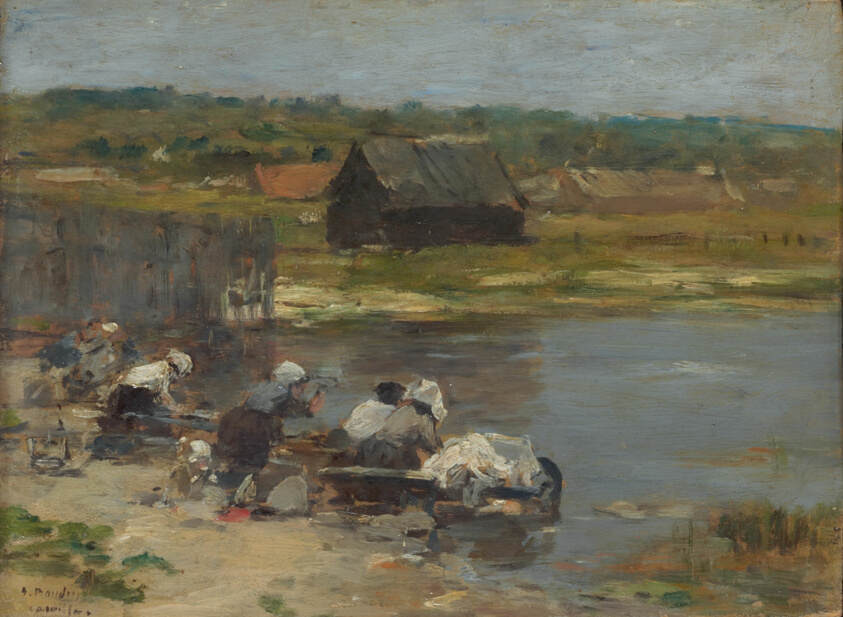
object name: Painting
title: Washerwomen at the Edge of the Pond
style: Impressionism, 19th century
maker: Eugène-Louis Boudin (French, 1824–1898)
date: c. 1880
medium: Oil on panel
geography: France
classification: oil on panel; french; oil paintings (visual works); paint; painting; european painting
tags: landscapes, rural life, hills, water, woman, labor, landscape, river, women, weather/seasons, everyday life (genre), work